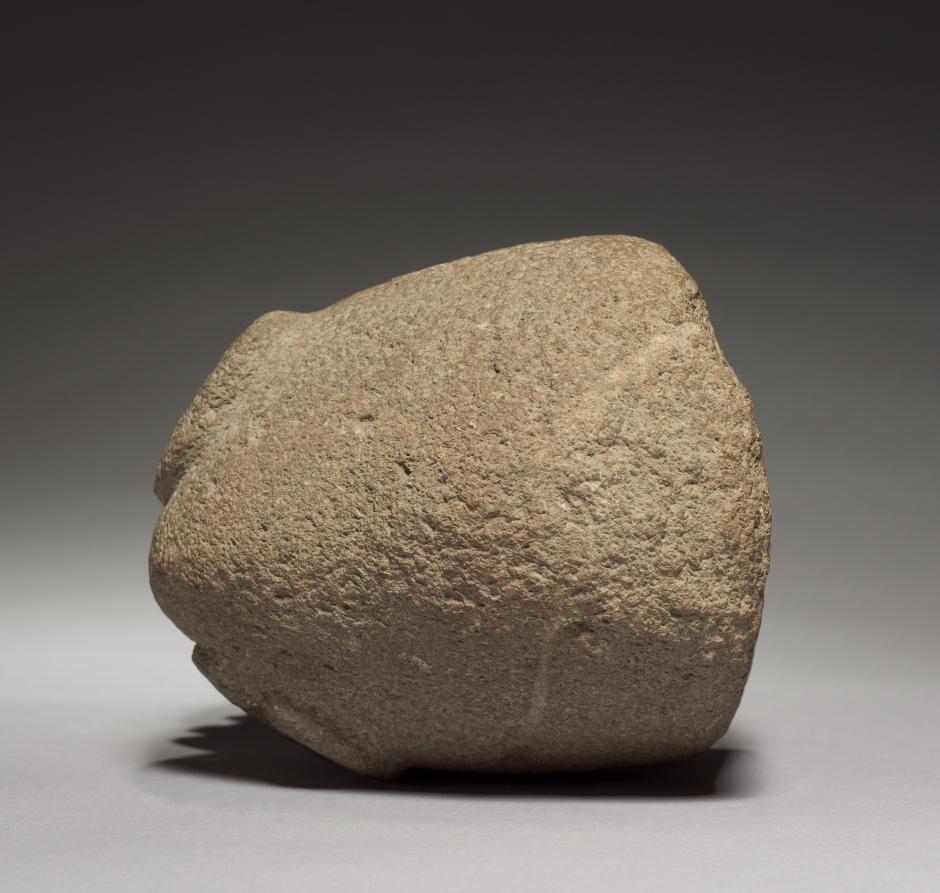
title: Head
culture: Mexico, Classic Veracruz (Totonac or Tajin)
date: 600–1100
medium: stone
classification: Sculpture